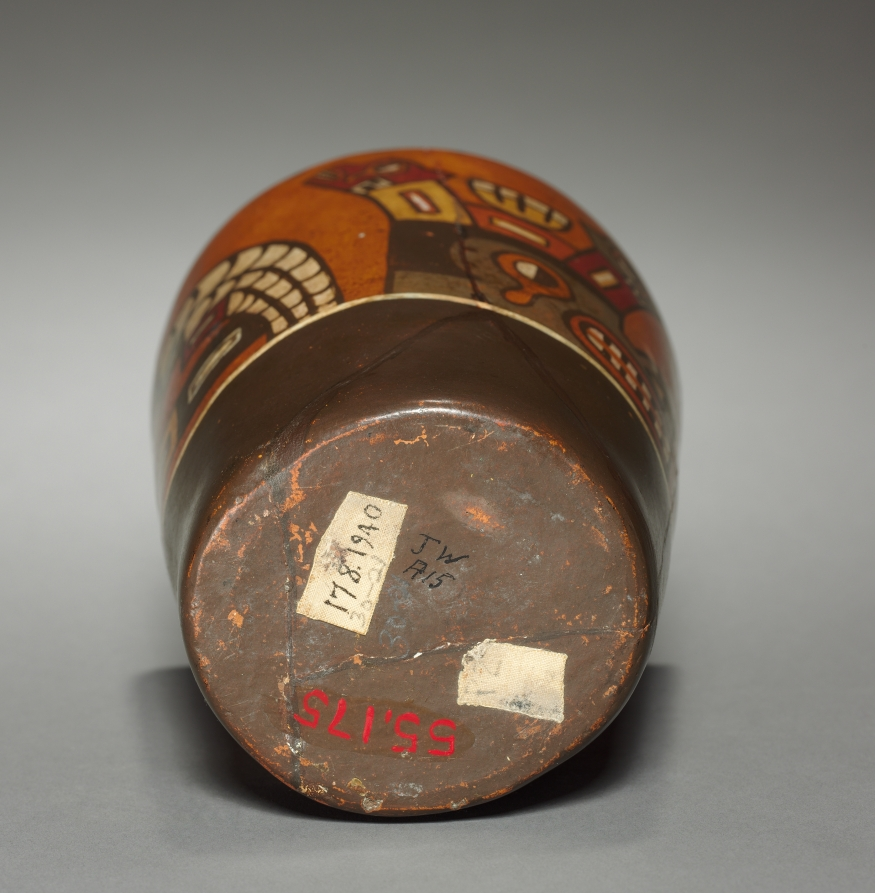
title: Kero-shaped Vessel (modern version of a Wari-style vessel)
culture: Peru, modern, 20th century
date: before 1955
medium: pottery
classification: Forgery